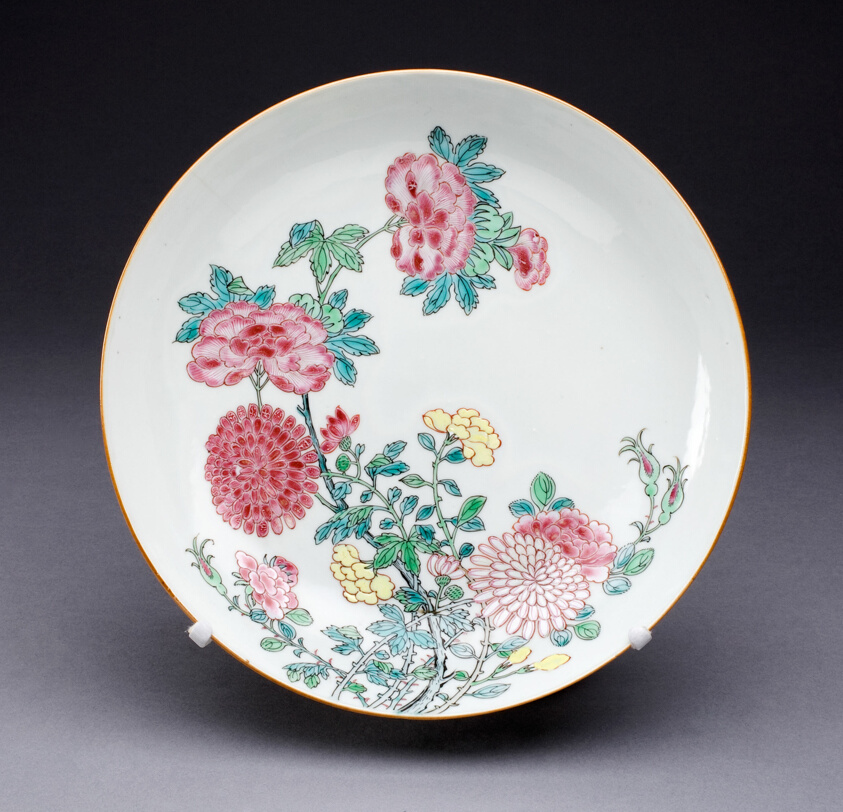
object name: Ceramics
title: Dish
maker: China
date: c. 1725, Qing Dynasty (1644–1911), Yongzhen period (1723–1735)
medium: Hard-paste porcelain and polychrome enamels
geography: China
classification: dish (vessel); ceramics